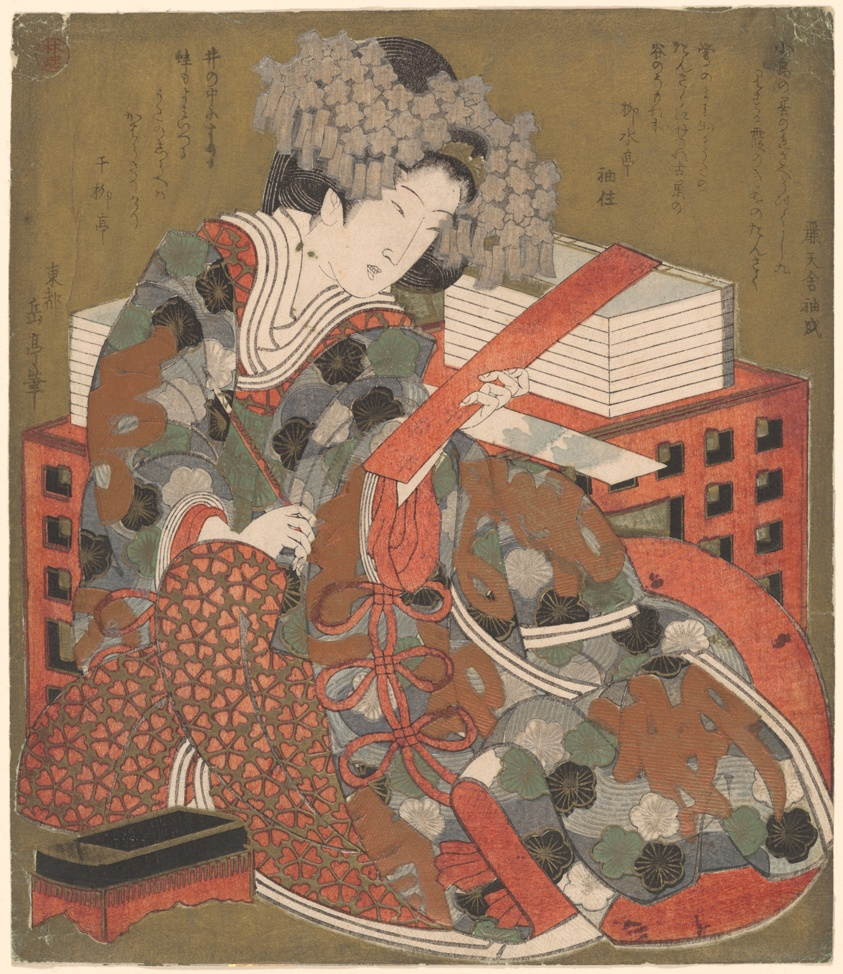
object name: Print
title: Woman About to Write a Poem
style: Japanese (culture or style)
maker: Yashima Gakutei (Japanese, 1786 (?)-1868)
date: c. 1824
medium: Color woodblock print with metallic pigments; surimono shikishiban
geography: Japan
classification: woodblock print; print; asian art